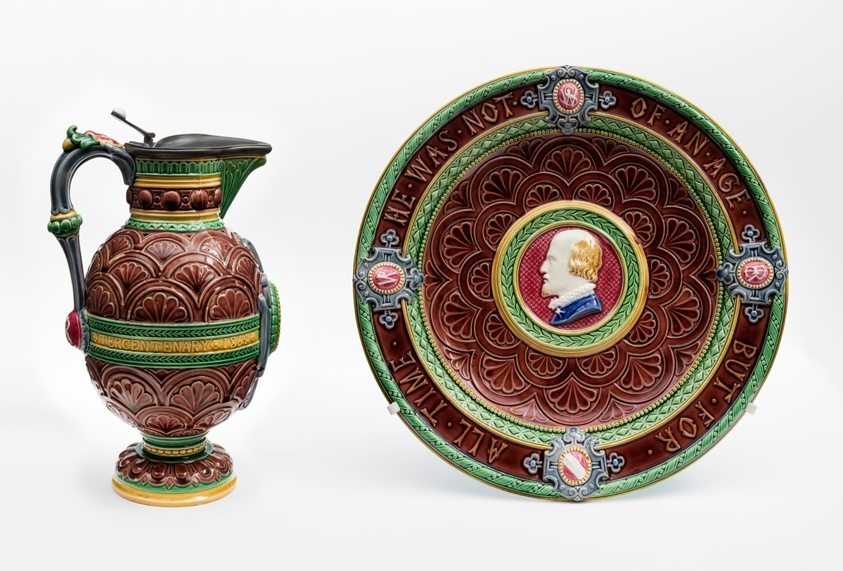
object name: Ceramics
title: Shakespeare Ewer and Basin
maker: Minton Pottery and Porcelain Factory; Stoke-on-Trent, England, founded 1793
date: Ewer: 1873, Basin: 1871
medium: Tin glazed earthenware with pewter mounts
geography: England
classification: ceramics